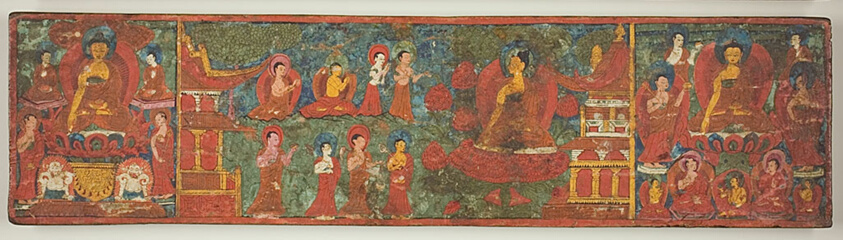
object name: Religious/Ritual Object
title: One of a Pair of Manuscript Covers with Buddha Overcoming Temptation Surrounded by Disciples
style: Himalayan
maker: Nepal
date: 18th century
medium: Pigments and metallic paint on wood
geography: Nepal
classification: ritual objects